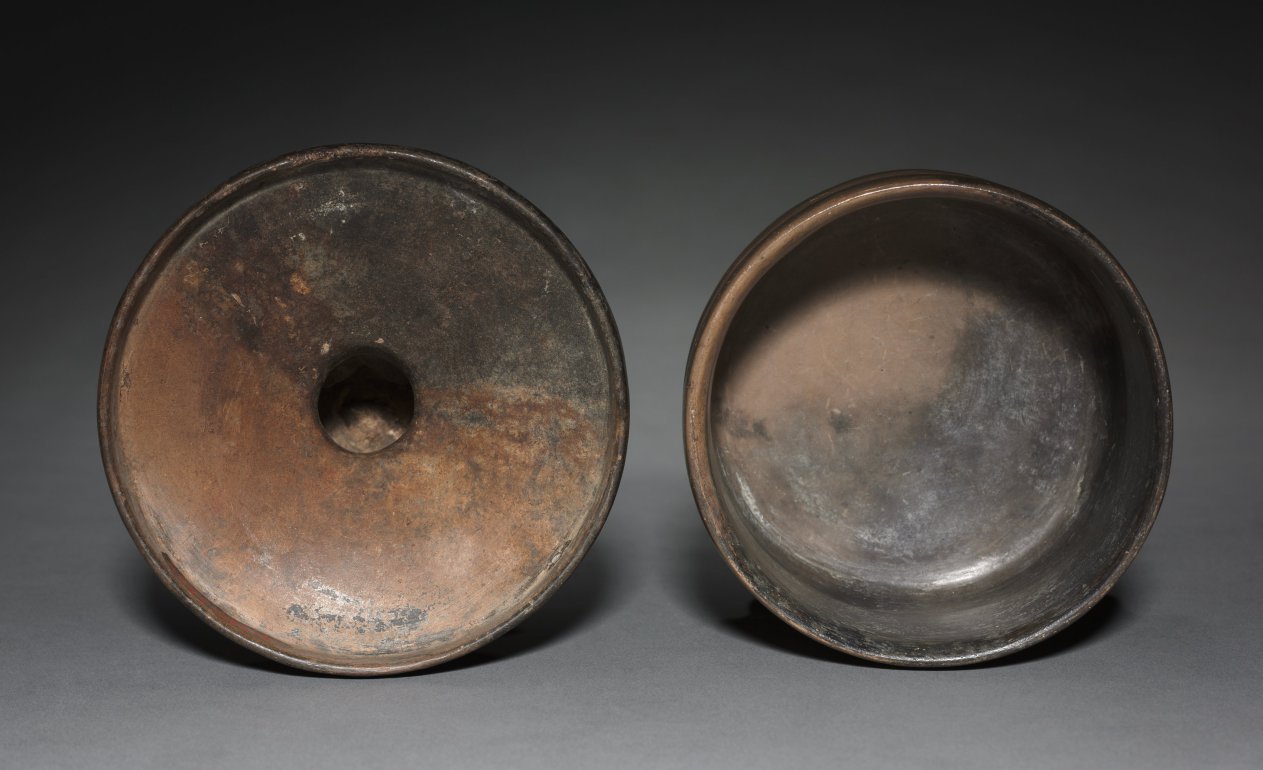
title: Tripod Vessel with Lid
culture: Mexico or Central America, Maya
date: 250–600 CE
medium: earthenware with pigment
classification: Ceramic